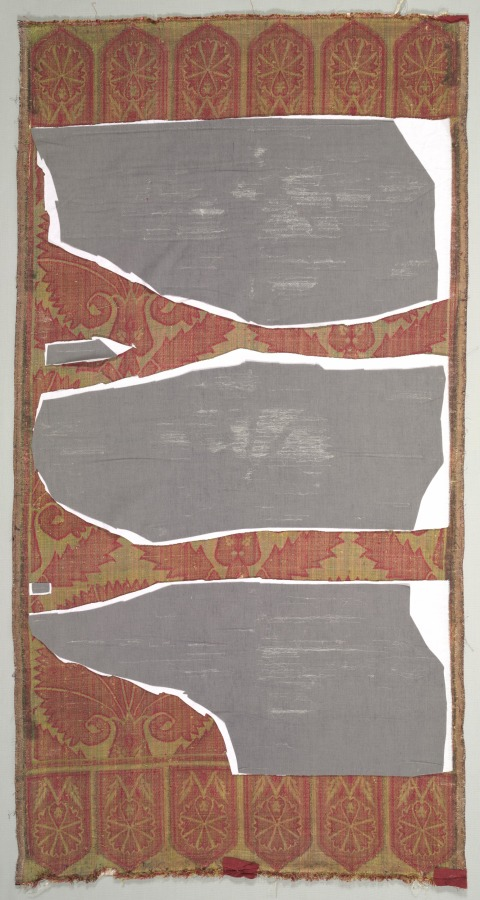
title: Brocaded velvet cushion cover with carnations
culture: Turkey, Bursa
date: late 1500s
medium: velvet, brocaded: silk, gilt-and-silver-metal thread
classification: Velvet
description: The lappet designs on the top and bottom identify this textile as an Ottoman cushion cover for a royal divan, or sofa, used in the royal court. Its bold, graphic pattern is made up of carnations in three staggered rows. Carnations are distinguished from other floral motifs by their sawtooth petals and serrated leaves.